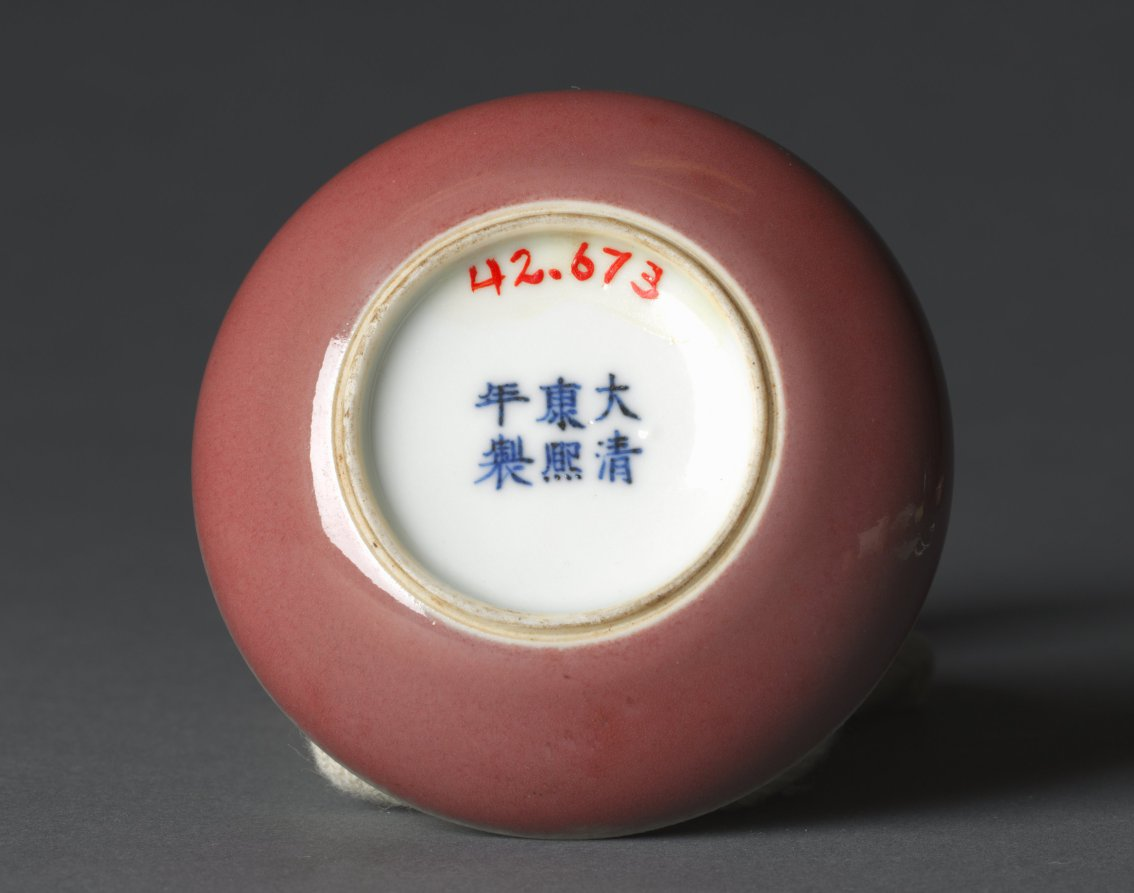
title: Seal Color Box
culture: China, Jiangxi province, Jingdezhen, Qing dynasty (1644-1911), Kangxi period (1662-1722)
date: 1662–1722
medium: porcelain with "peach bloom" glaze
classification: Ceramic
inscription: 大清康熙年制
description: The "peach-bloom" glaze developed during the Kangxi era has been described as "drunken with beauty."